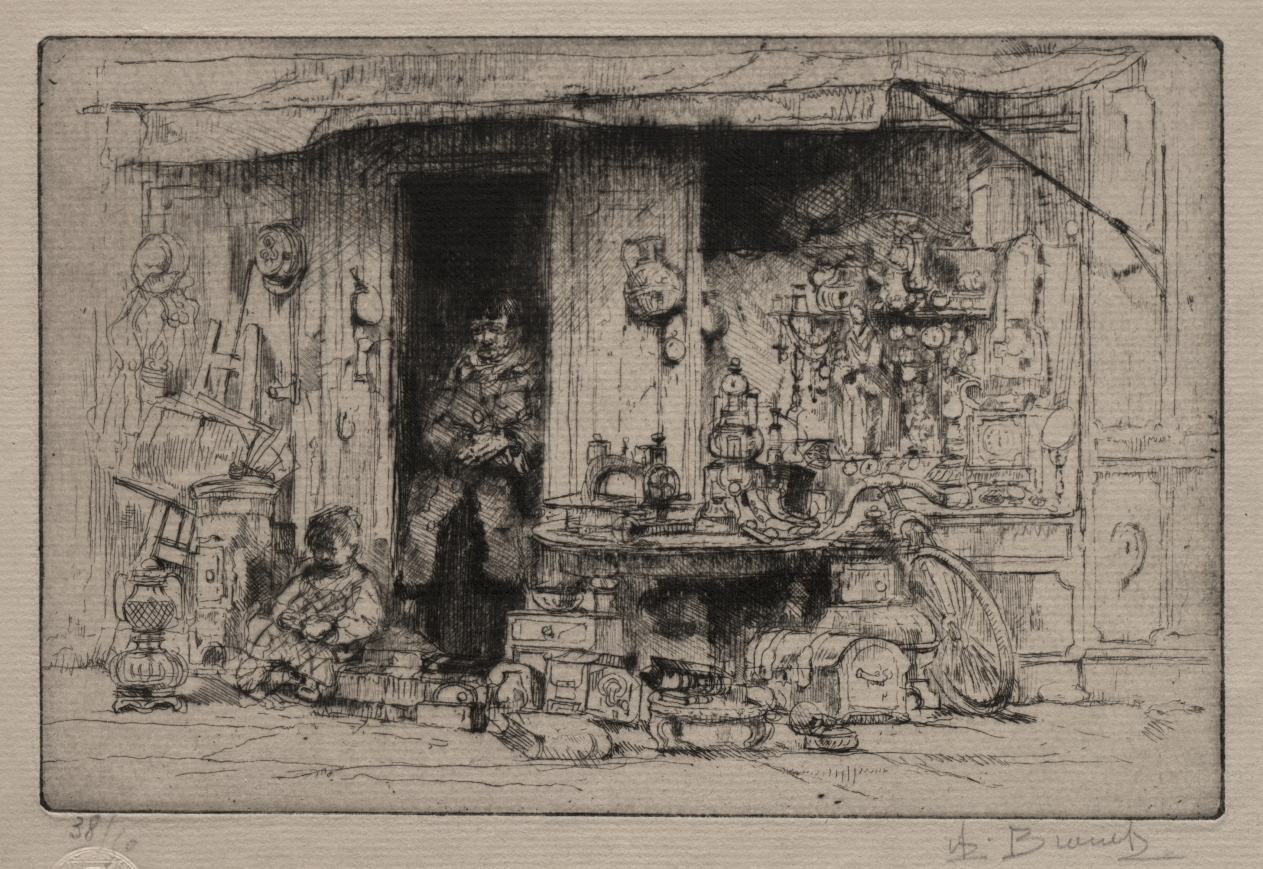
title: The Odds and Ends Dealer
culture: France, 20th century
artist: Auguste Brouet (French, 1872–1941)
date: c. 1902–41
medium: etching and drypoint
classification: Print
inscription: in graphite, lower left: 38/50; lower right: A. Brouet